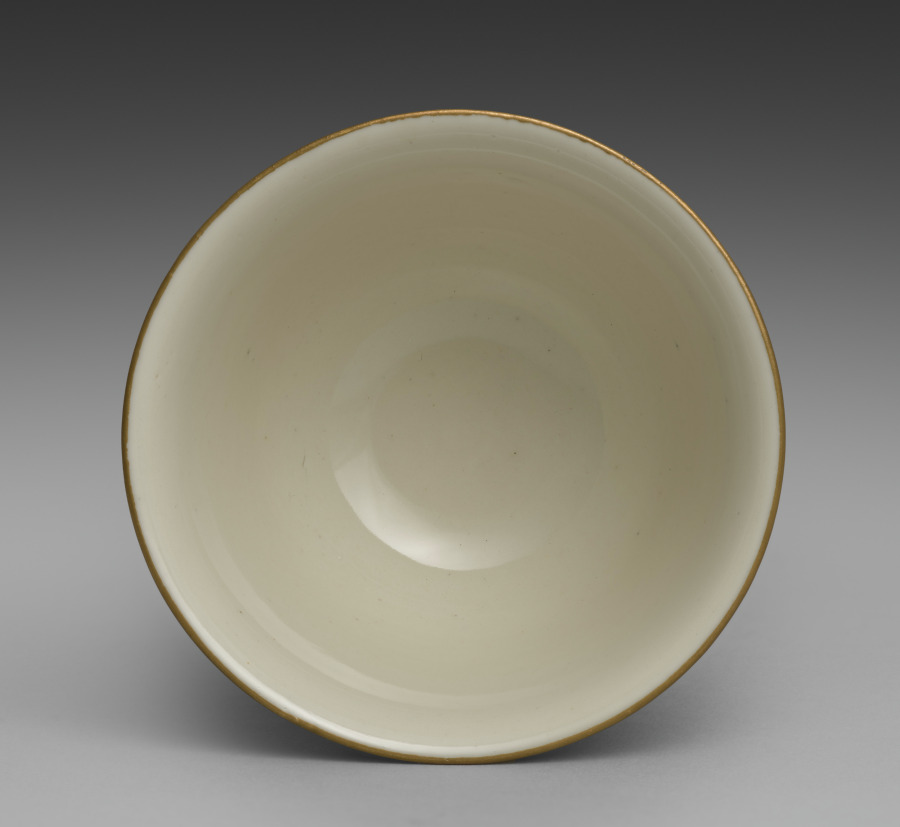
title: Drinking Cup from Dining Set with Plum Blossoms and Cracked-Ice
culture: Japan, Meiji period (1868–1912)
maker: Seifū Yohei II (Japanese, 1844–1878)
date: c. 1875–78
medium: Porcelain with molded designs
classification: Ceramic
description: Each item in this set has a delicate low-relief design of flowering plum branches over scattered, intersecting lines meant to resemble the cracked-ice surface of a frozen body of water and is signed on the base in gold pigment. While Yohei II produced many fine works in underglaze blue, like those produced by Kiyomizu Shichibei, he also made works in quite different styles later in his career, from the early 1870 s. In 1873, he was appointed purveyor to the Industrial Center of Kyoto Prefecture, a designation associated with Kyoto’s efforts to reach an international market through the port of Kobe; and from 1875 until his death, he was involved in national-level projects to present Japanese ceramics across the world. It was during this period that Yohei III was apprenticed to Yohei II, and it has been suggested that this set may in fact be an early example of Yohei III’s work, which he signed with his teacher’s name. Decorated with flowers resembling Japanese textile motifs, the set calls to mind the design of Yohei II’s pair of vases with plum blossoms in the Victoria and Albert Museum. Here, the elaborate trees created for a formal public exhibition setting have been translated into the approachable blossoms of the genteel domestic environment. While the designs are consistent across the pieces, each raised flower petal and pistil and each incised line in the ice was done by hand, so the cups, bowls, and dishes are similar yet unique. The bottoms of two boxes once identified the set’s owner, but the information has been deliberately obscured with black ink. However, inscriptions still visible appear to indicate two occasions, once at the end of July 1886 , and once again in June 1916 , when parts of the set were requested from Hokura in Niigata Prefecture. The location corresponds to a neighborhood in the present-day city of Jōetsu. The surname Tsuji 辻 also appears on a paper tag affixed to one of the box cloths. Future research may possibly reveal more about their provenance. A vase by Yohei III in a private collection combines the formal grandeur of the Yohei II vases in the Victoria and Albert Museum with the gentler design of this dining set, placing flowering plum trees against soft, scalloped-edge clouds resembling those in golden screens.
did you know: The dining wares have a creamy white coloration that the four boxes containing them identify as Korean in style.